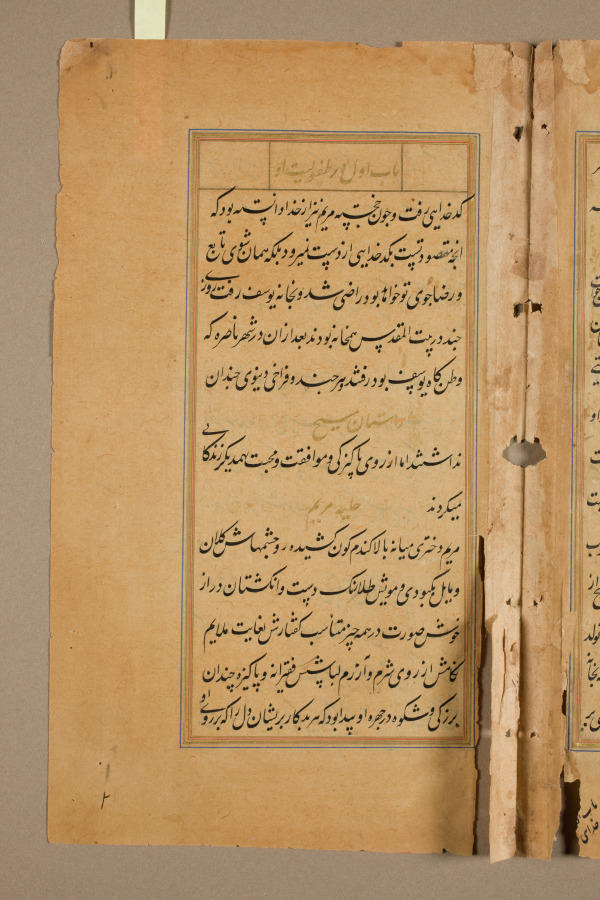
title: Text, folio 13 (recto), from a Mirror of Holiness (Mir’at al-quds) of Father Jerome Xavier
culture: Mughal India, Allahabad, made for Prince Salim (1569–1627)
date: 1602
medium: Ink and gold on paper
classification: Manuscript